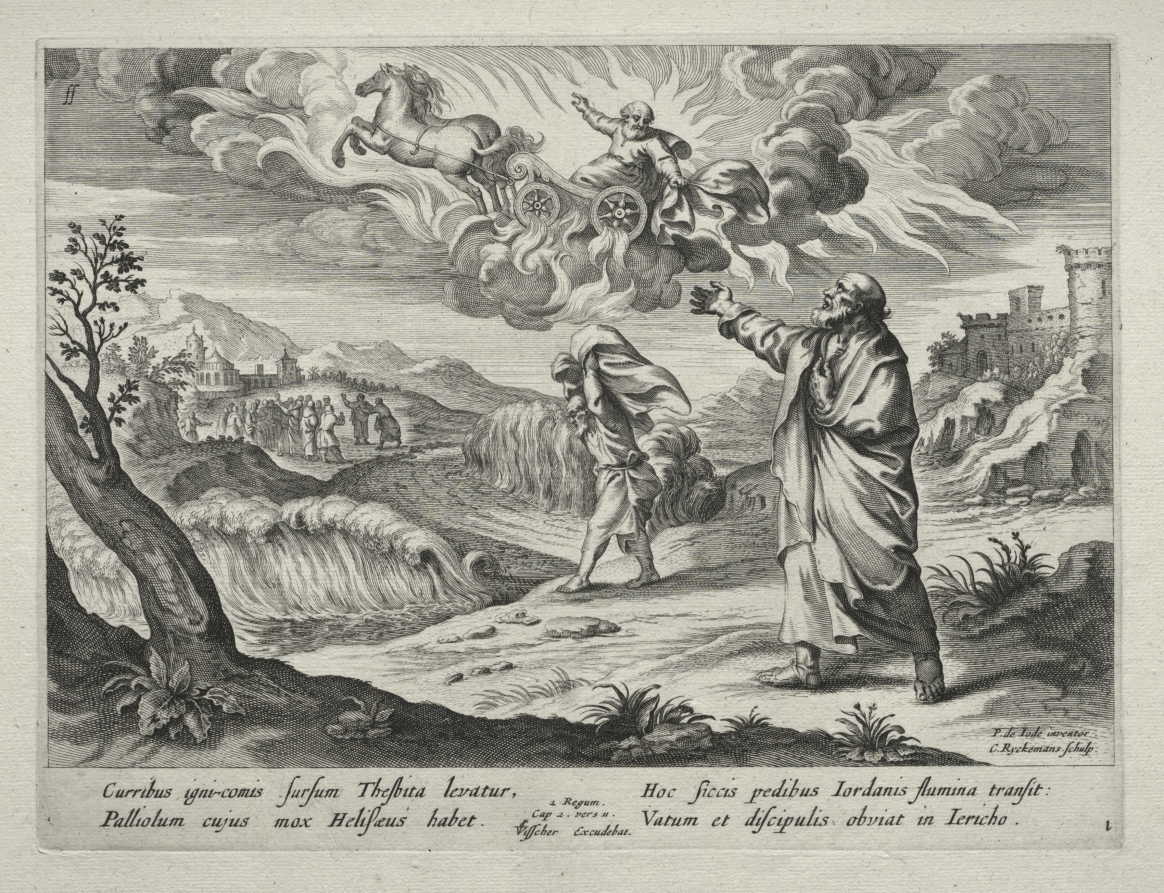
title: The Story of Elisha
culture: Flanders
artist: Nicolaes Rijckmans (Flemish, 1616-)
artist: after Pieter I de Jode (Flemish, 1570–1634)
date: 1643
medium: engraving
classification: Print